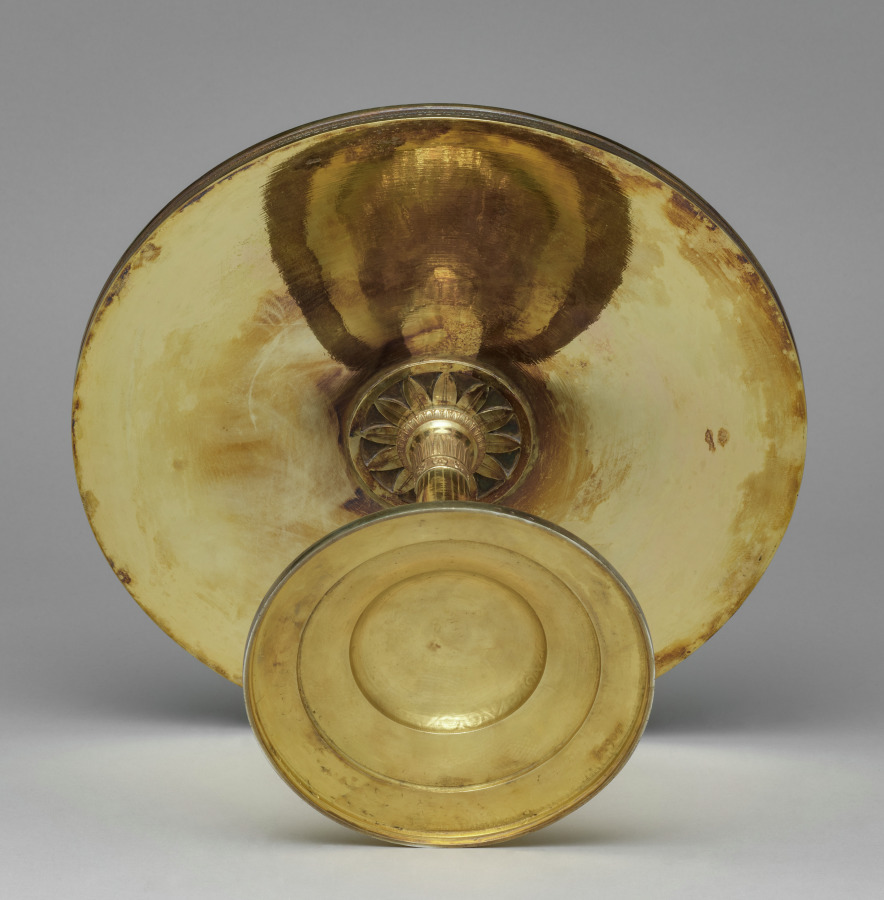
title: Tazza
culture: Italy, Rome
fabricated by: Pietro Paolo Spagna (Italian, 1793–1861)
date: c. 1815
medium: silver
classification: Silver